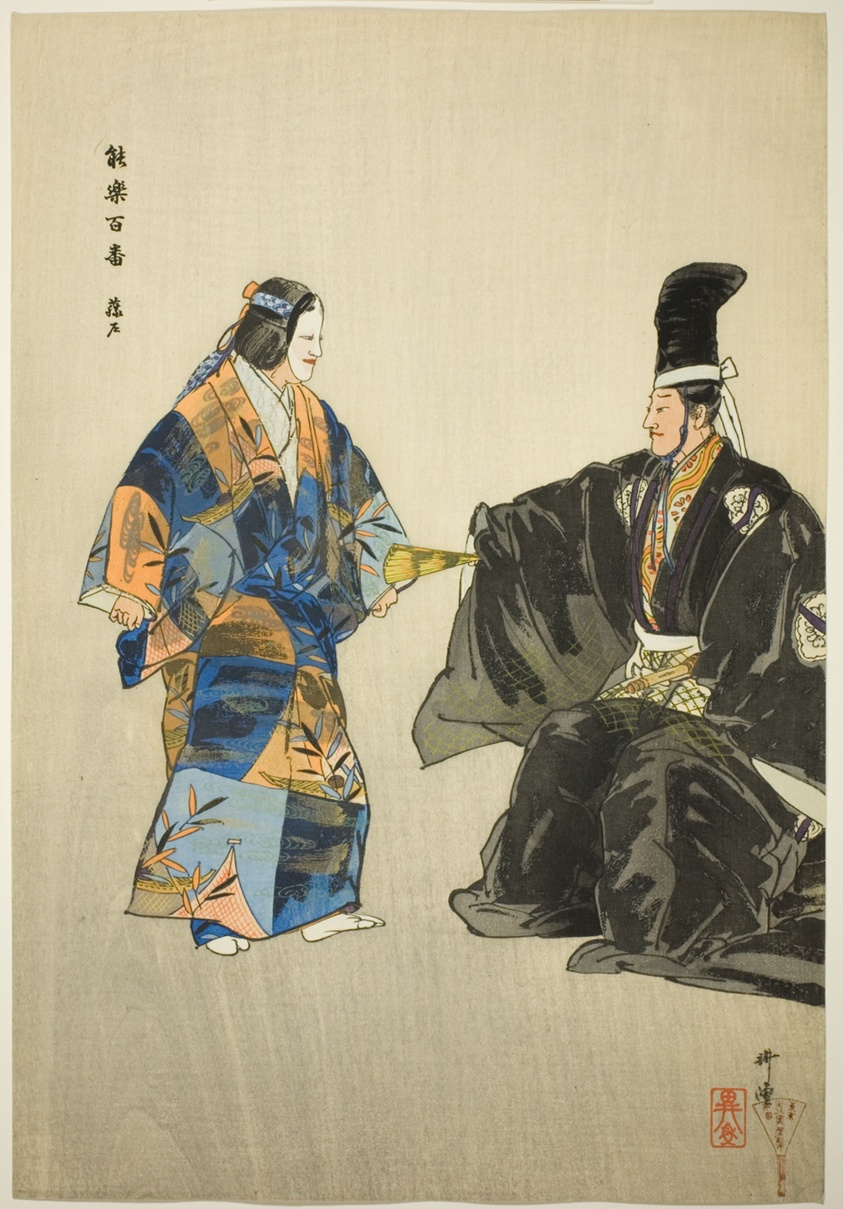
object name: Print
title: Fujito, from the series "One Hundred No Dramas (Nogaku hyakuban)"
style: Japanese (culture or style)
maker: Tsukioka Kogyo; Japanese, 1869-1927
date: 1898/1903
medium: Color woodblock print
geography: Japan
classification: woodblock print; print; asian art